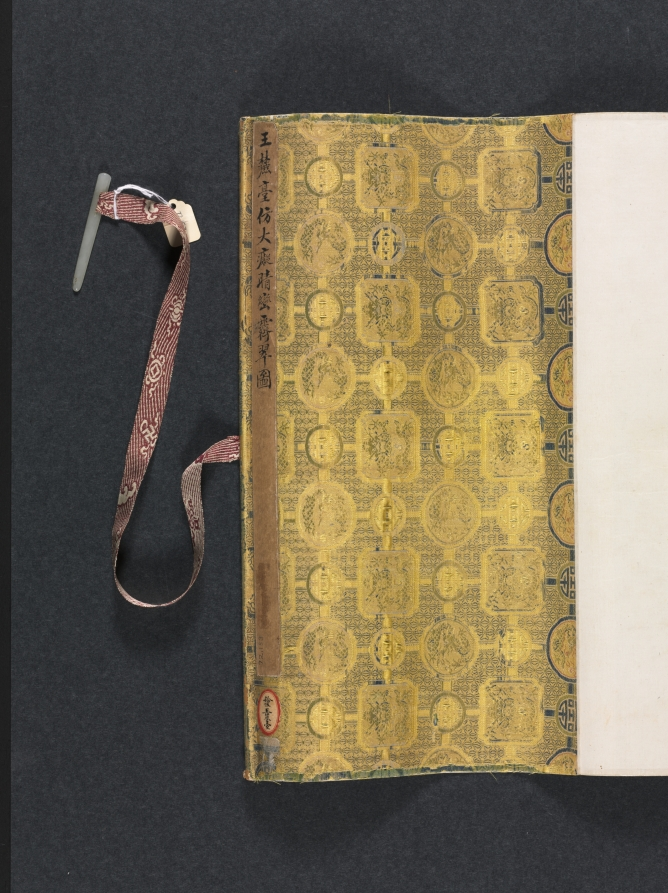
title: Green Peaks under Clear Sky: After Huang Gongwang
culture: China, Qing dynasty (1644-1911)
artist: Wang Yuanqi (Chinese, 1642–1715)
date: 1703–8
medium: handscroll; ink and light color on paper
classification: Painting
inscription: 晴巒霽翠：倣黃子久。麓臺。[印]石師道人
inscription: [印] 御書畫圖留與人看. 子久畫於宋諸大家荊、關、李、范、董、巨，無所不有。運筆不假修飾。皴法由淡入濃，化諸家之迹者也。澹明徐君偶見縮本，臨摹六幅。囑余參以富春大意，成一長卷。余夙夜在公，乘暇偶一點染。至戊子九秋告竣，閱四、五年矣。昔大癡為無用師作富春卷，七年而成，為千古鉅觀。今拙筆癡鈍。亦淹留至此。可為識者噴飯矣。王原祁題。[印]王原祁印; 麓臺 [印, 畫芯左下] 西廬後人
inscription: 3 additional colophons and 15 additional seals: 1 colophon and 9 seals of Yang Shicong 楊士驄 (b. 1870); 1 colophon of Wu Hufan 吳湖帆 (1894–1968); 1 colophon and 1 seal of Wu Mei (20th c.); 5 seals of Cheng Qi 程琦 (1911–1988).